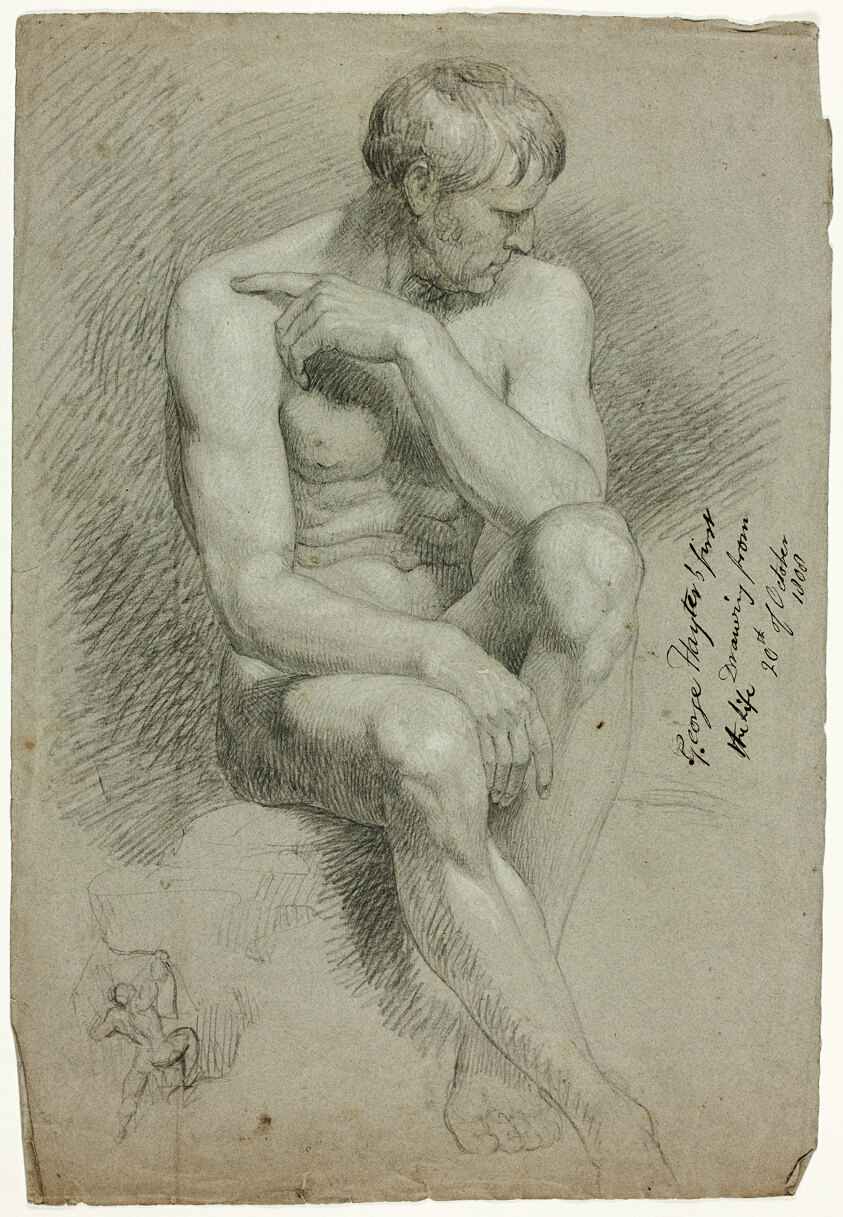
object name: Drawing and Watercolor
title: Seated Male Nude with Sketch of Nude Archer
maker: George Hayter (English, 1792-1871)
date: October 20, 1808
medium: Black and white chalk on blue wove paper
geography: England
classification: chalk; drawings (visual works); prints and drawing; paper